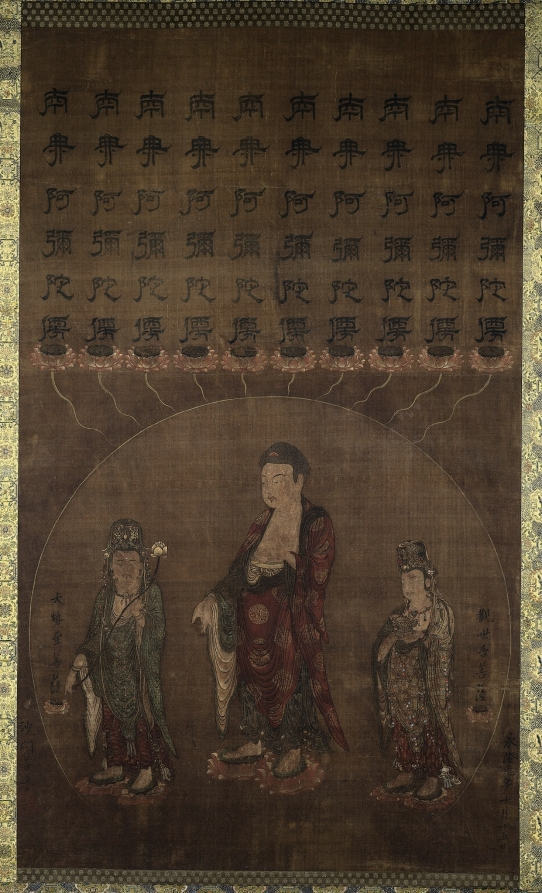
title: Buddha Amitābha with Two Attending Bodhisattvas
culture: China, Southern Song dynasty (1127-1279)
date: 1200s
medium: Hanging scroll; ink and color on silk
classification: Painting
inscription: 南無阿彌陀佛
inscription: 沙門善導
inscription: 觀世音菩薩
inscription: 大勢至菩薩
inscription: 永隆元年十月十五日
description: The supreme deities that rule over the Western Paradise—Amitābha (阿彌陀 in Chinese), Avalokiteśvara (Guanyin 觀音), and Mahāsthāmaprāpta (Dashizhi 大勢至)—are here enclosed within a circle of light. To secure entry into that paradise for Buddhist followers of the Pure Land sect, one must recite the phrase namo amituofo (南無阿彌陀佛, Homage to the Buddha Amitābha). Here the phrase is repeated 10 times in calligraphy above the figures, reinforcing the need for continual recitation.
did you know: Each line of calligraphy, which invokes the Buddha's name, emerges from a lotus blossom.